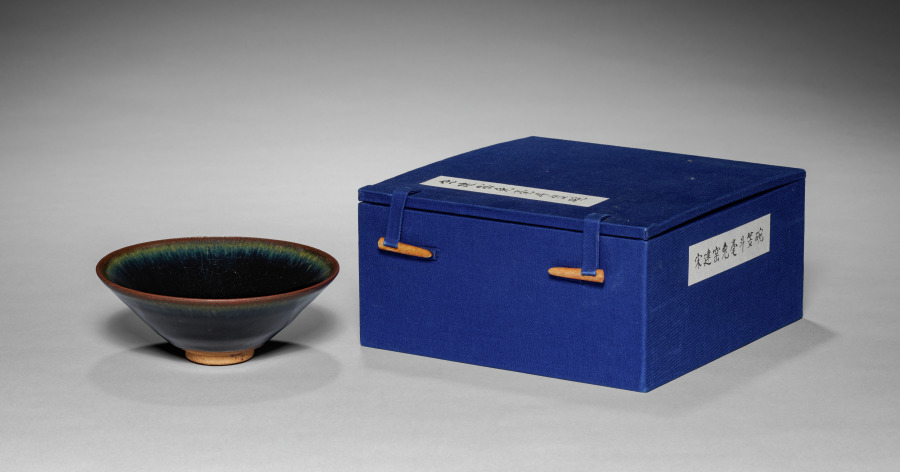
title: Black Glazed Teabowl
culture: China, Fujian province, Southern Song dynasty (1127-1279)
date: 1100s–1200s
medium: Stoneware with opaque dark brown glaze, Jian ware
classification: Ceramic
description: This teabowl exhibits a shiny almost mirror-black, thick glaze that runs down from the mouth showing fine, bluish-brown streaks around the rim. The Northern Song dynasty emperor Huizong (徽宗, reigned 1100–1126) once referred to the markings as “hare’s fur.” The emperor also remarked that Jian bowls should be deep and wide to allow tea powder to be whisked sufficiently in the bowl. The contrast between the tea’s white foam and the dark glaze was appreciated by connoisseurs. The thick walls and conical shape of the bowls were ideal for keeping tea hot and frothy.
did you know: Jian ware was made in Fujian province, first in kilns at Jian’an and later at Jianyang.